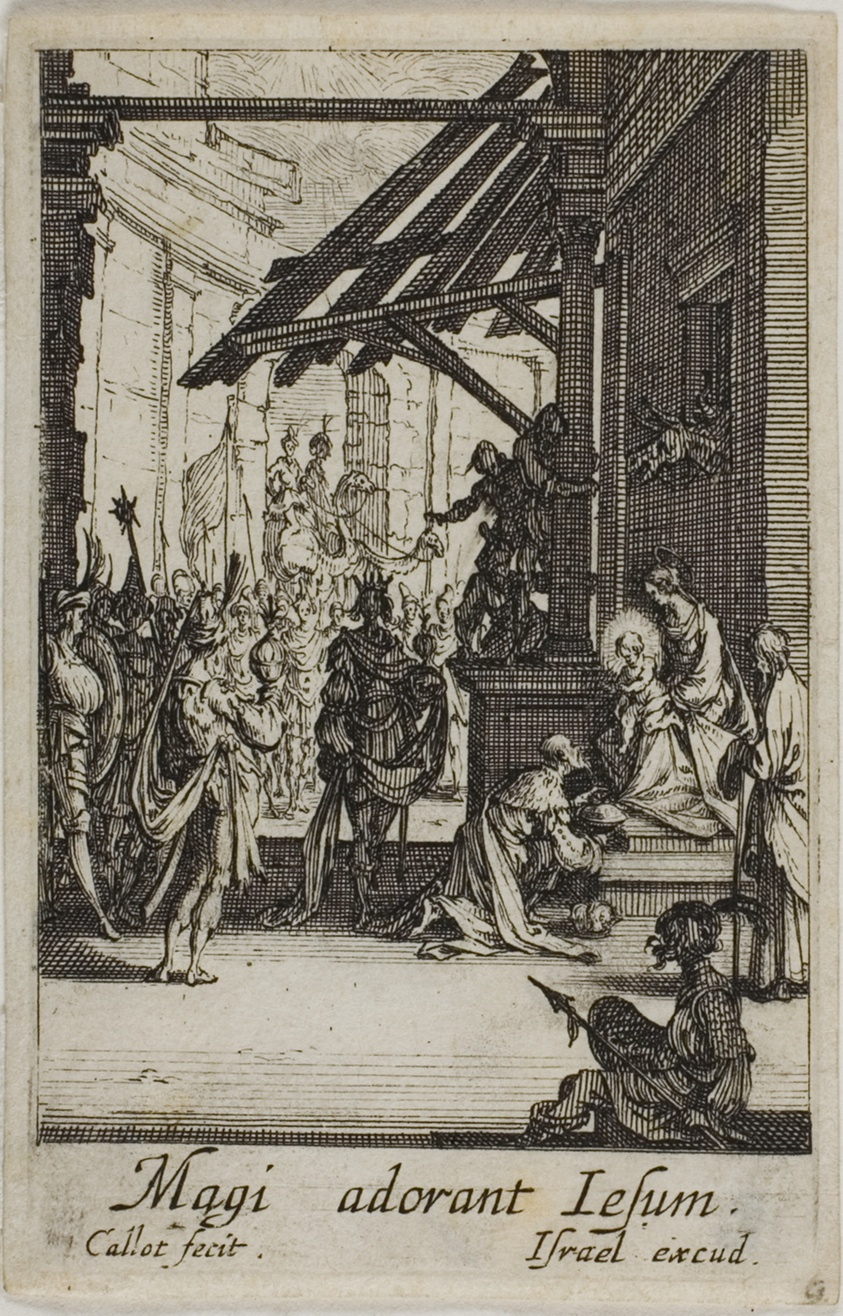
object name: Print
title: The Adoration of the Magi, from The Life of the Virgin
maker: Jacques Callot (French, 1592-1635)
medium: Etching on paper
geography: France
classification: etching; print; prints and drawing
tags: Virgin and child/Madonna and child, Christian subjects, mythology, prints and drawings, diamond shapes, magii